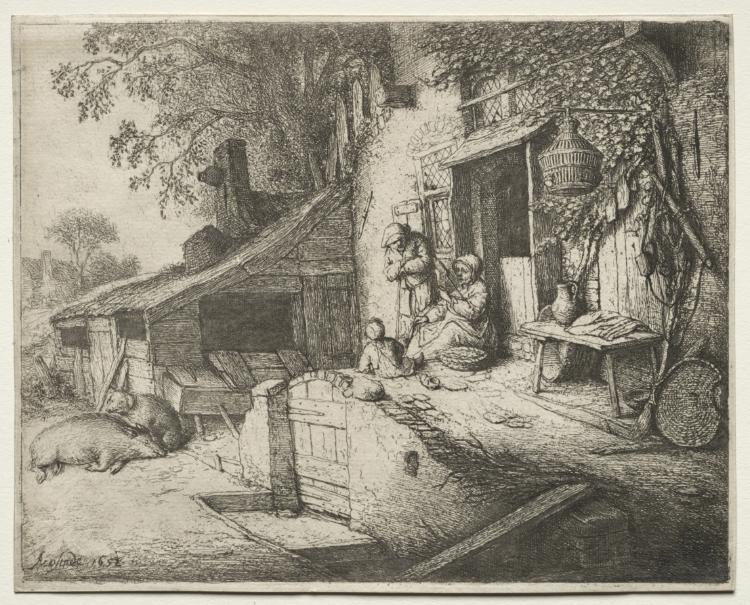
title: The Woman Spinning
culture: Netherlands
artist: Adriaen van Ostade (Dutch, 1610–1684)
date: 1652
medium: etching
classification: Print